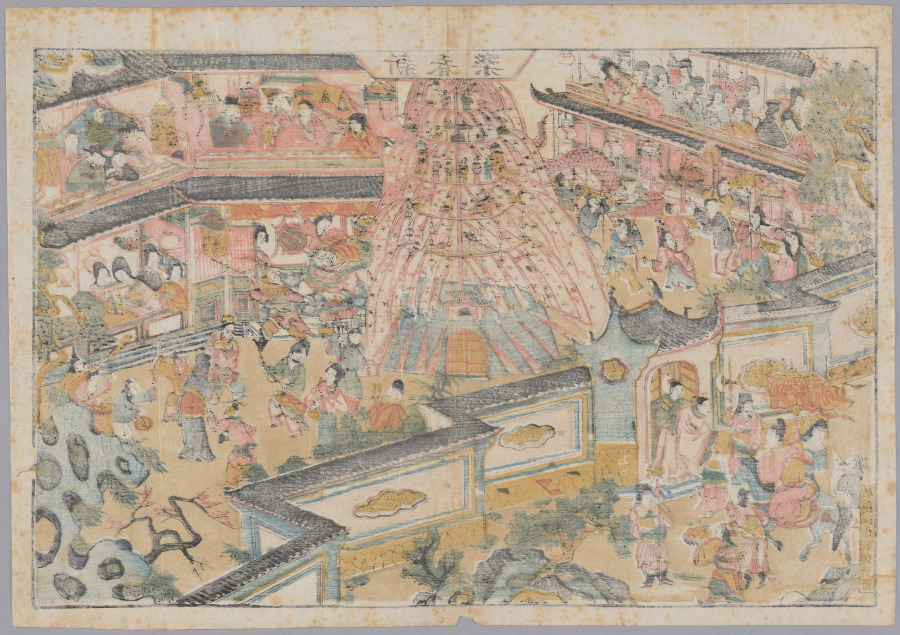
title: Happy New Year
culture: China, Qing dynasty (1644–1911), Kangxi reign (1622–1722)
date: 1662–1722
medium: Polychrome woodblock print; ink and color on paper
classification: Print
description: In the 1600s, printing flourished in such Jiangnan cities as Nanjing, Suzhou, Hangzhou, and Huizhou, evolving from privately enjoyed illustrated books printed in color to more commercialized single-sheet color prints that were hung on walls and became part of the rich urban visual culture.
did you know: Woodblock printing in color reached a height in China in the 1600s to 1700s. The prints were executed by means of sets of separate blocks, each carved to print a different color.